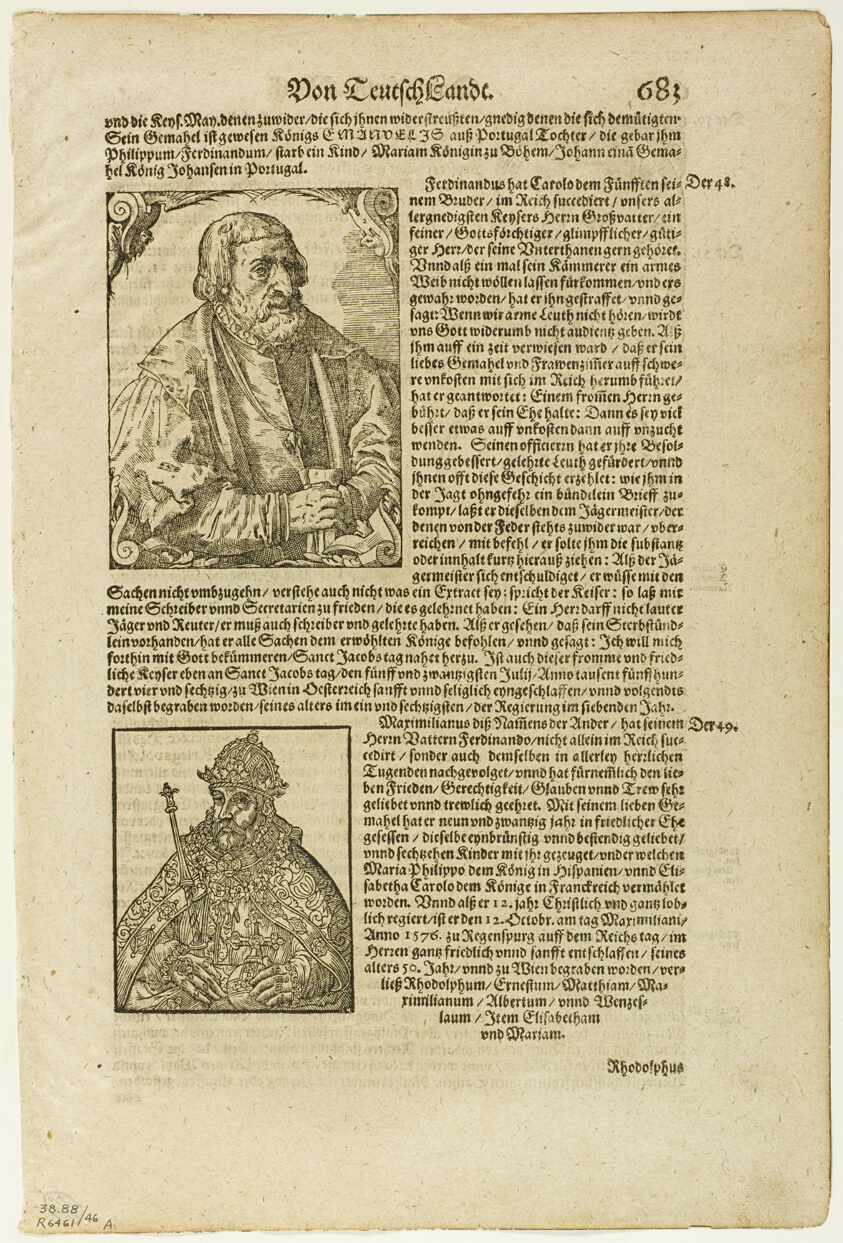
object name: Print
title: Illustration from "Kosmographie" by Sebastian Munster, plate 46 from Woodcuts from Books of the XVI Century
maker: Unknown Artist (Swiss, 16th century); assembled by Max Geisberg (Swiss, 1875-1943)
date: 1564, assembled into portfolio 1937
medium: Woodcut on paper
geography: Switzerland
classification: woodcut; print; prints and drawing